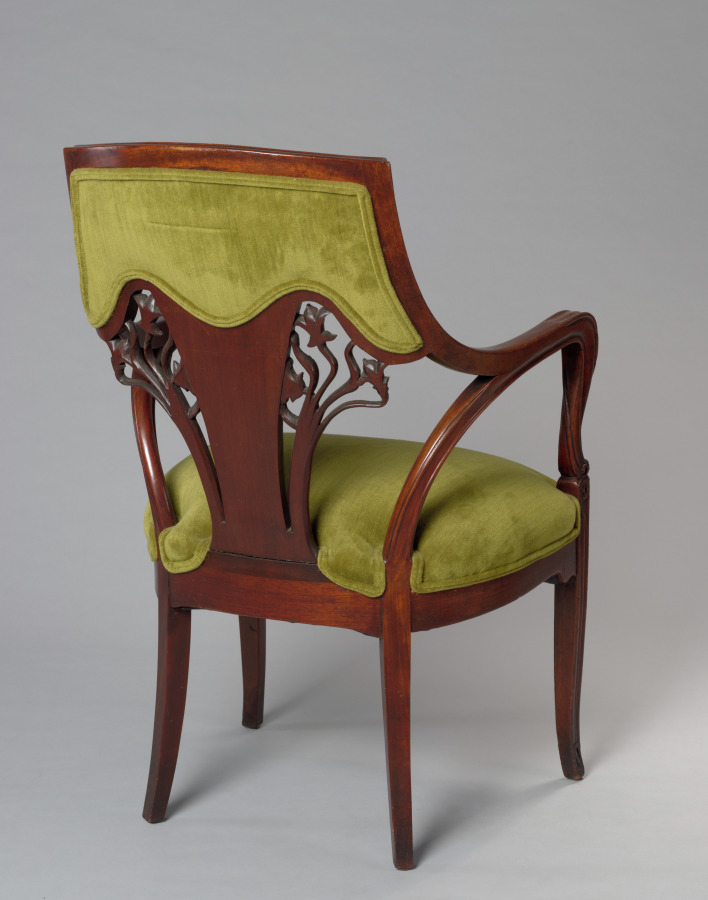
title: Chair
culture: France, Nancy ?, early 20th Century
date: c. 1900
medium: mahogany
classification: Furniture and woodwork